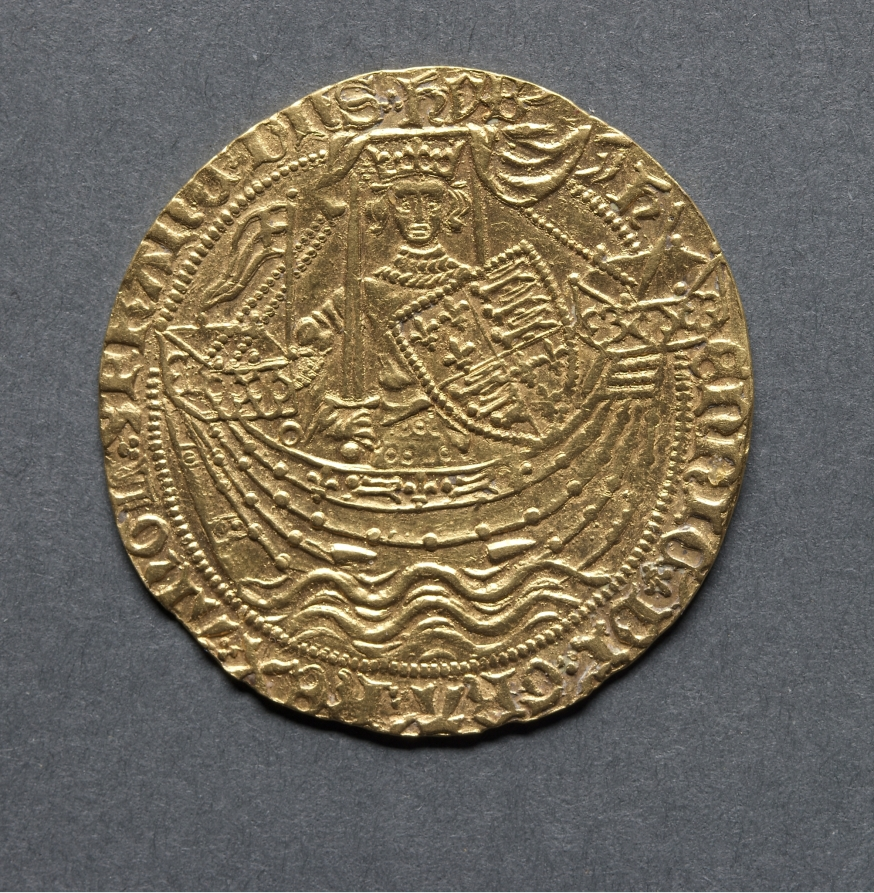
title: Noble: Henry VI in Ship with Shield of Arms (obverse)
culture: England, Henry VI, 1422-1461 (restored 1470-1471)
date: 1422–1461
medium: gold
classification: Coins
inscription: HENRIC DI GRA REX ANGL Z FRANC DNS HYB